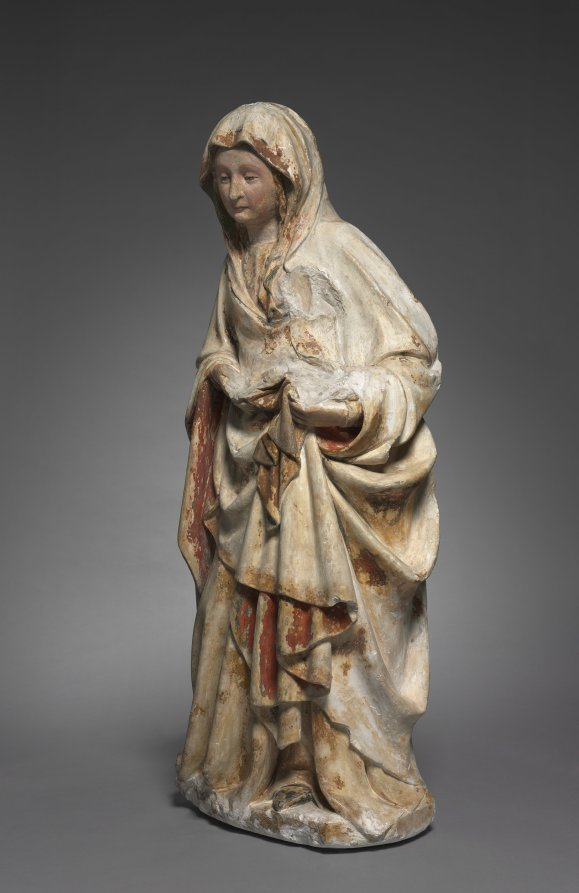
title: Standing Virgin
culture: Netherlands, active Dijon, 15th century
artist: follower of Claus de Werve (Netherlandish, 1380–1439)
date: c. 1440–1450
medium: painted and gilded limestone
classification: Sculpture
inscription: inscriptions on reverse.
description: This standing Virgin now lacks the child she once cradled in her left arm. The sculpture may have been damaged in the French Revolution by falling onto its face. It was carved from soft white limestone of a type known to be quarried at Asnières-lès-Dijon, near Champmol. The figure recalls many of the hallmarks of the style of Claus de Werve, a Netherlandish artist active at the court of Burgundy. The Virgin has a sweet, round face that is also smooth and fleshy, her eyelids droop pensively and she is engulfed in rich voluminous draperies that cascade in deep folds. This sculpture should be seen as a charming reflection of de Werve’s many Virgin and Child groups. It was probably carved by a follower closely acquainted with his style.